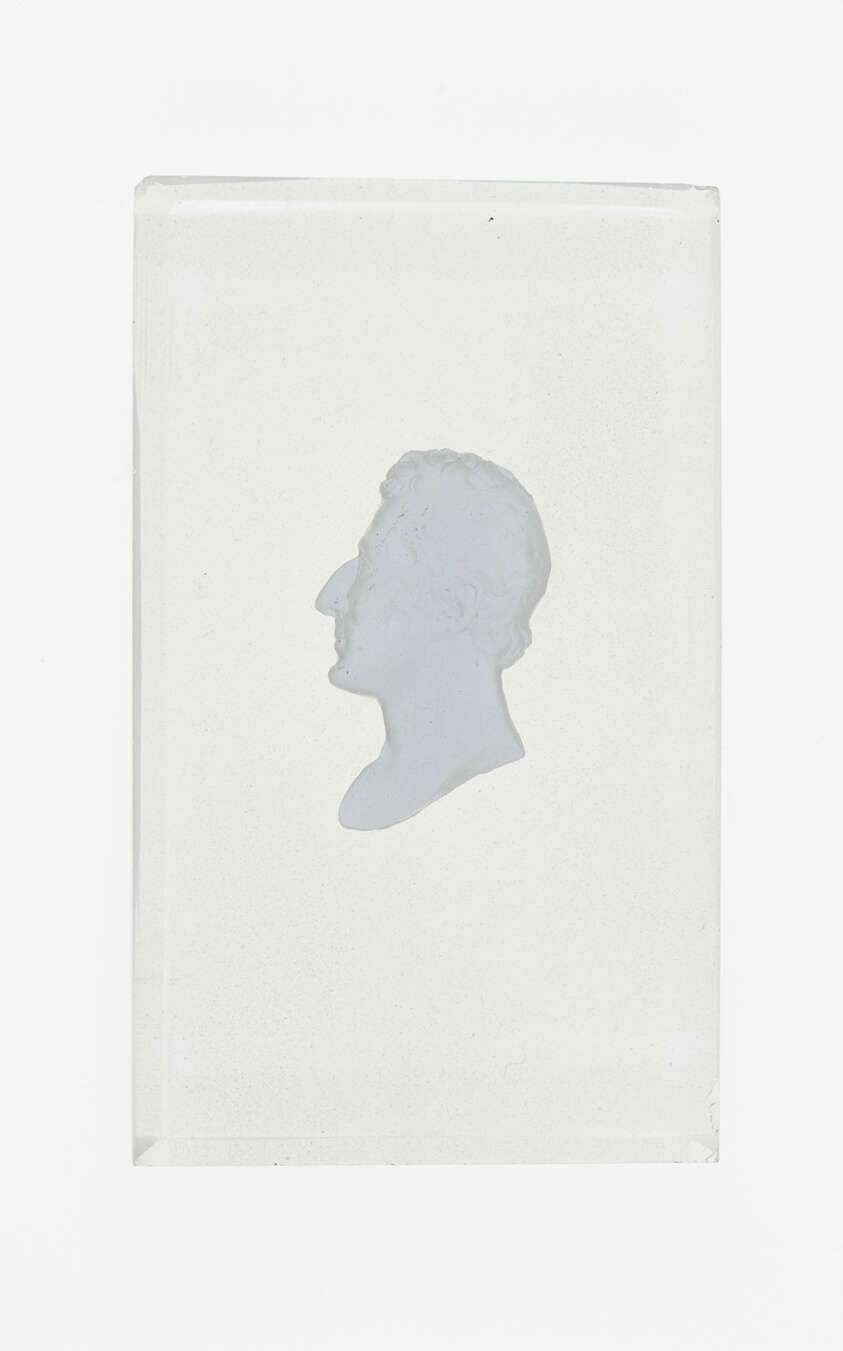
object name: Glass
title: Paperweight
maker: French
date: Mid 19th century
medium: Glass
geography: France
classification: paperweight; glass